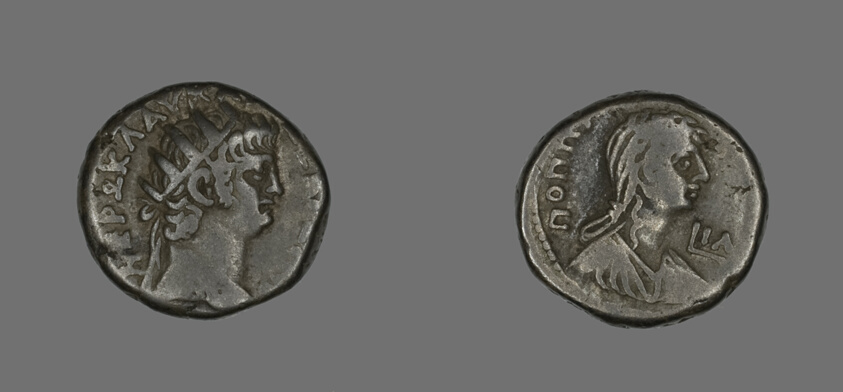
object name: Coin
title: Tetradrachm (Coin) Portraying Emperor Nero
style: roman (ancient, style or period), ancient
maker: Roman, minted in Alexandria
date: 54-68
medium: Billon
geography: Roman Empire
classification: coin; ancient art